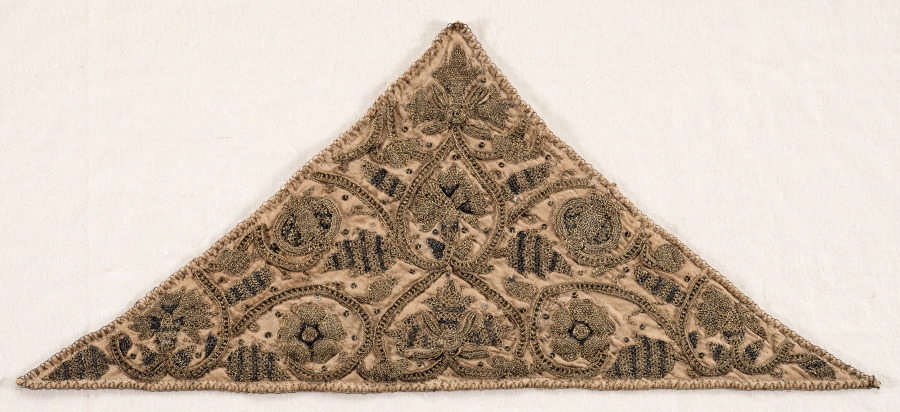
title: Forehead Cloth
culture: England, Elizabethan Period, late 16th century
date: late 1500s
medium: Silk, gold and silver thread, sequins, padding, linen; embroidery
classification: Embroidery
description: Sumptuous interlacing scrolls bearing flora and fruit embroidered with gold, silver, and silk thread decorate this set composed of a coif (cap see 1934.206) and forehead cloth (seen here). Individual motifs representing England appear within the scrolls, such as the Tudor rose, carnation, honeysuckle, and acorn. Fashionable ladies wore coifs in the house as semiformal dress and in bed for receiving guests. The large loops along its lower edge were drawn together to keep it in place. Worn pointing backward, the forehead cloth functioned like a visor, supposedly preventing wrinkles and keeping off the sun and cold air.